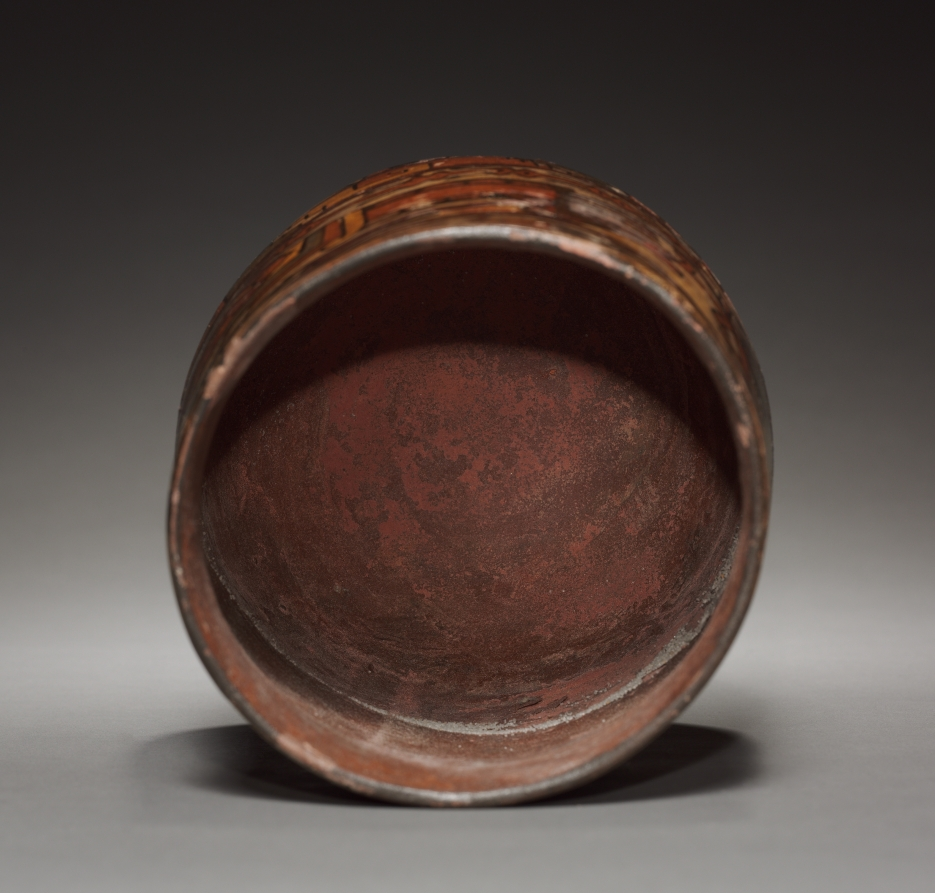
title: Vase with Trophy-heads and Warriors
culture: Peru, South Coast, Nasca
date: c. 450–600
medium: earthenware with colored slips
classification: Ceramic